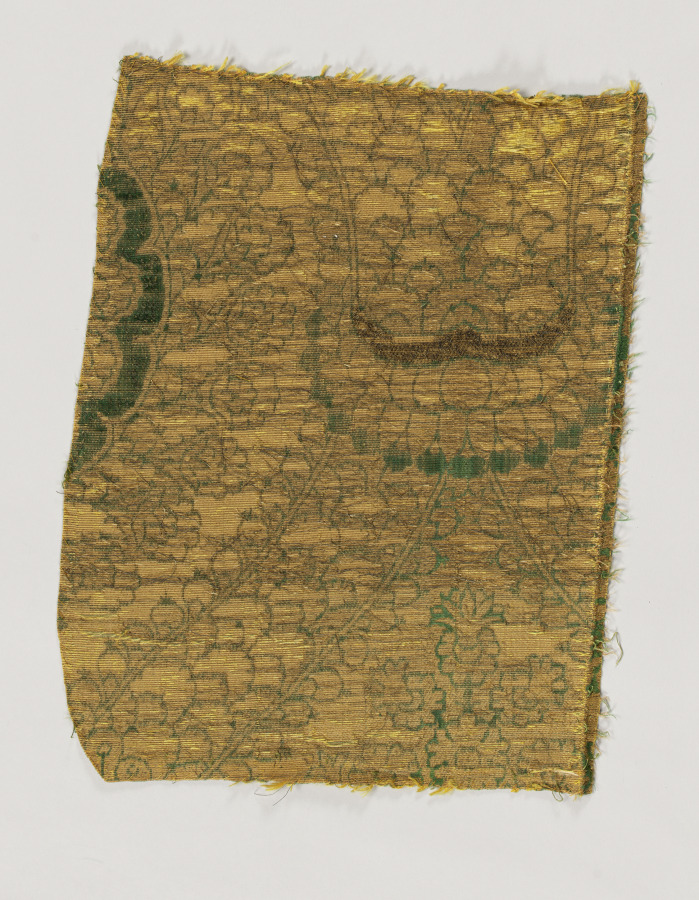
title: Velvet Fragments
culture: Spain, early 16th century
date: early 16th century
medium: velvet (cut, voided, and brocaded): silk and gold thread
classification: Velvet